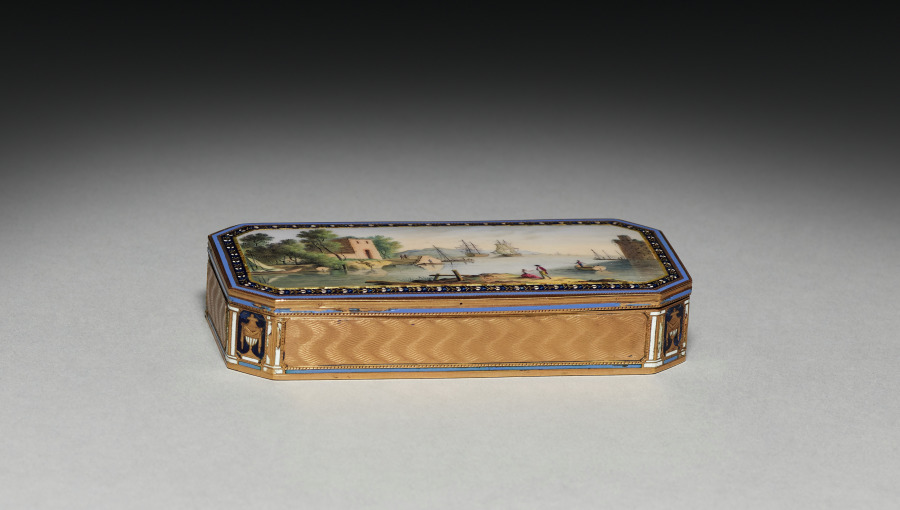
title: Box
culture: Switzerland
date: early 1800s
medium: gold and enamel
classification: Miscellaneous